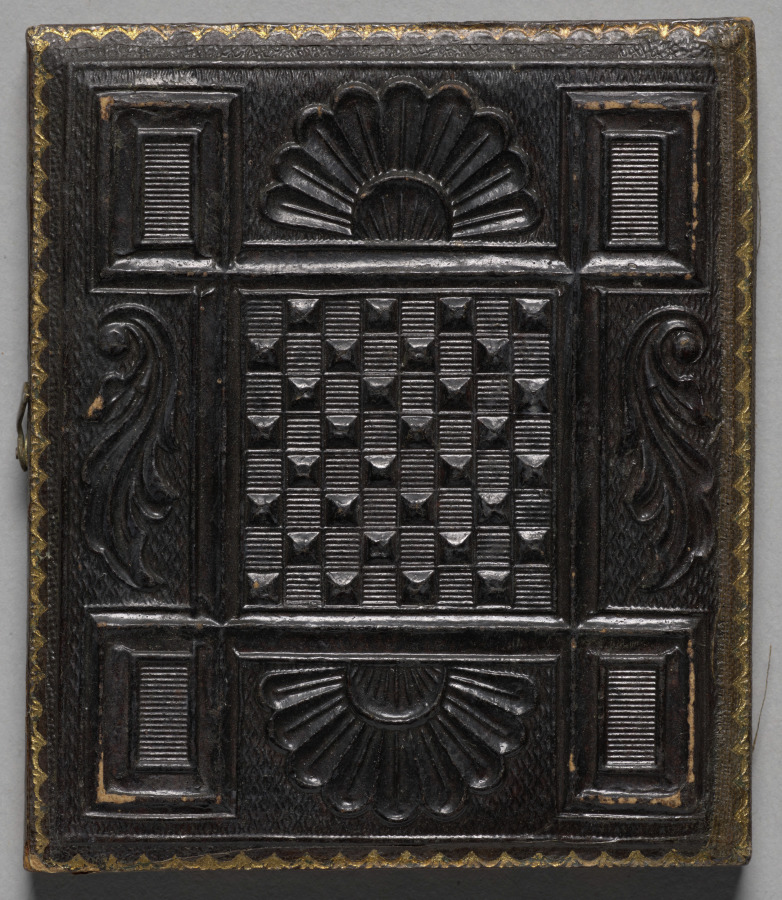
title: Seated old woman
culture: America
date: c. 1864–65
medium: ambrotype, tinted, sixth plate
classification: Photograph